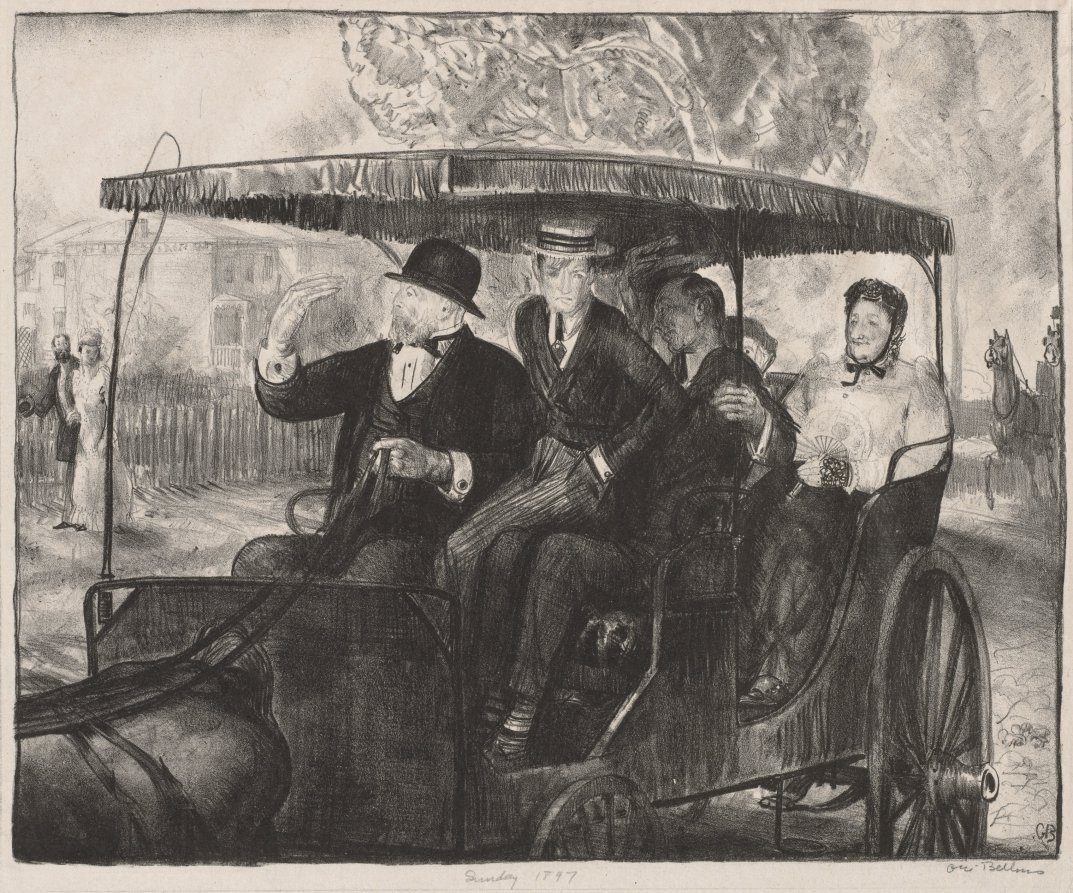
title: Sunday 1897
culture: America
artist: George Bellows (American, 1882–1925)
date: 1921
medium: lithograph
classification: Print